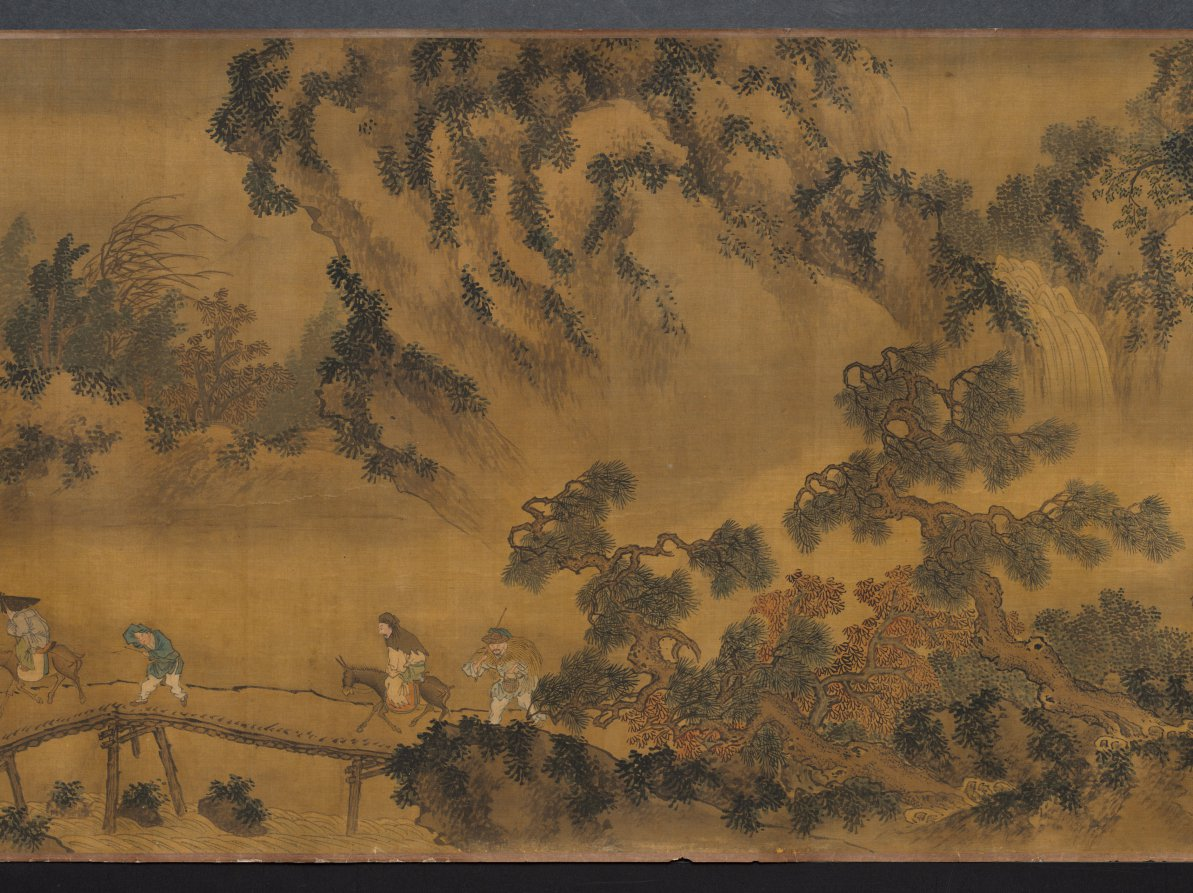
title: Returning to the Village in a Rainstorm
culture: China, Ming dynasty (1368–1644)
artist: Xie Shichen (Chinese, 1487–after 1567)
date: 1530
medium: Handscroll; ink and light color on silk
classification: Painting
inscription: 風雨歸村圖 嘉靖庚寅秋日樗仙謝時臣. [印] 謝時臣印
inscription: 3 additional seals unidentified.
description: This scroll depicts a wind- and rainswept landscape with figures in the countryside struggling against a late summer monsoon rainstorm. Such weather was familiar to residents of the lower Yangzi delta. Xie Shichen spent most of his life in the Suzhou area. Details of his career are scant, but his surviving works suggest that he made his living as a professional painter. This painting conveys drama and anecdotal observations, characteristic of Zhe school paintings, such as the one by Lü Wenying, CMA 1970.76.